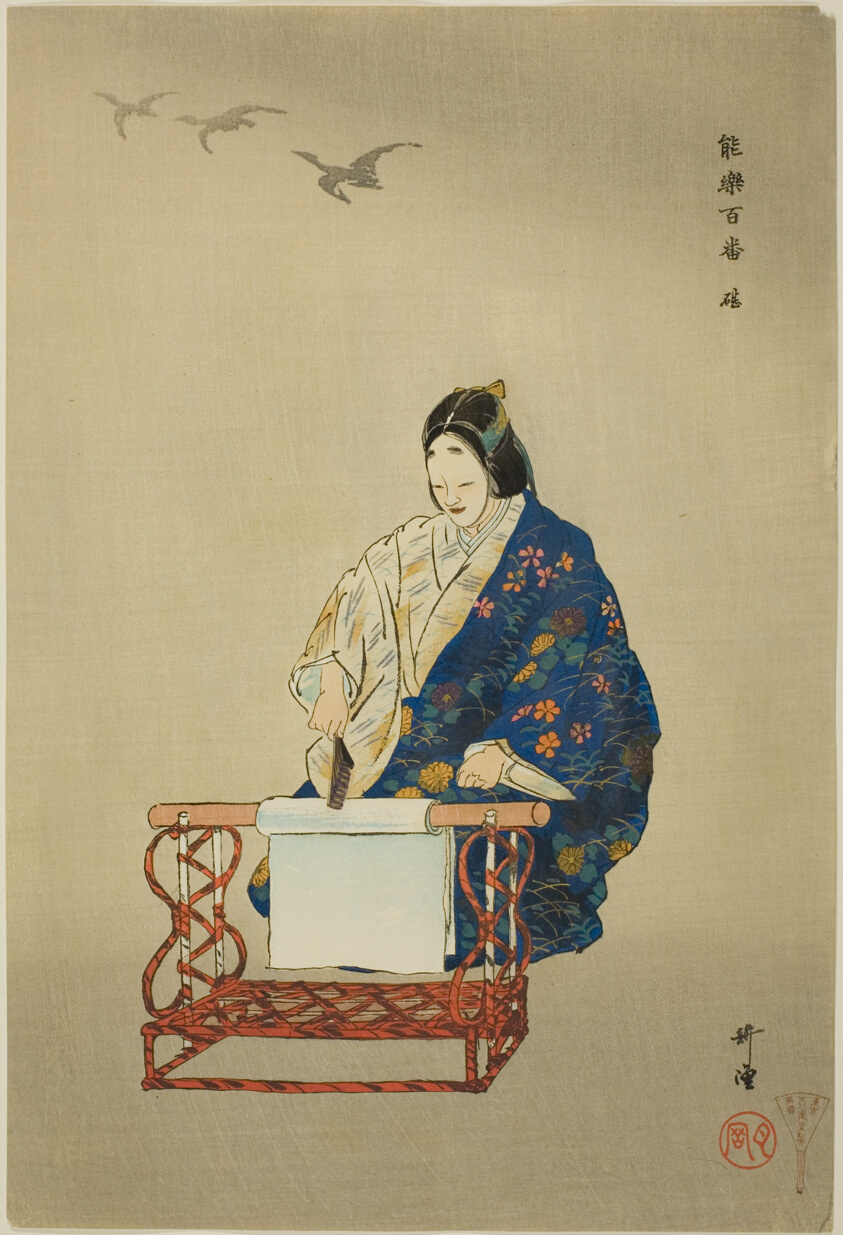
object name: Print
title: Kinuta, from the series "One Hundred No Dramas (Nogaku hyakuban)"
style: Japanese (culture or style)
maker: Tsukioka Kogyo; Japanese, 1869-1927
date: 1898/1903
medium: Color woodblock print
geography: Japan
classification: woodblock print; print; asian art